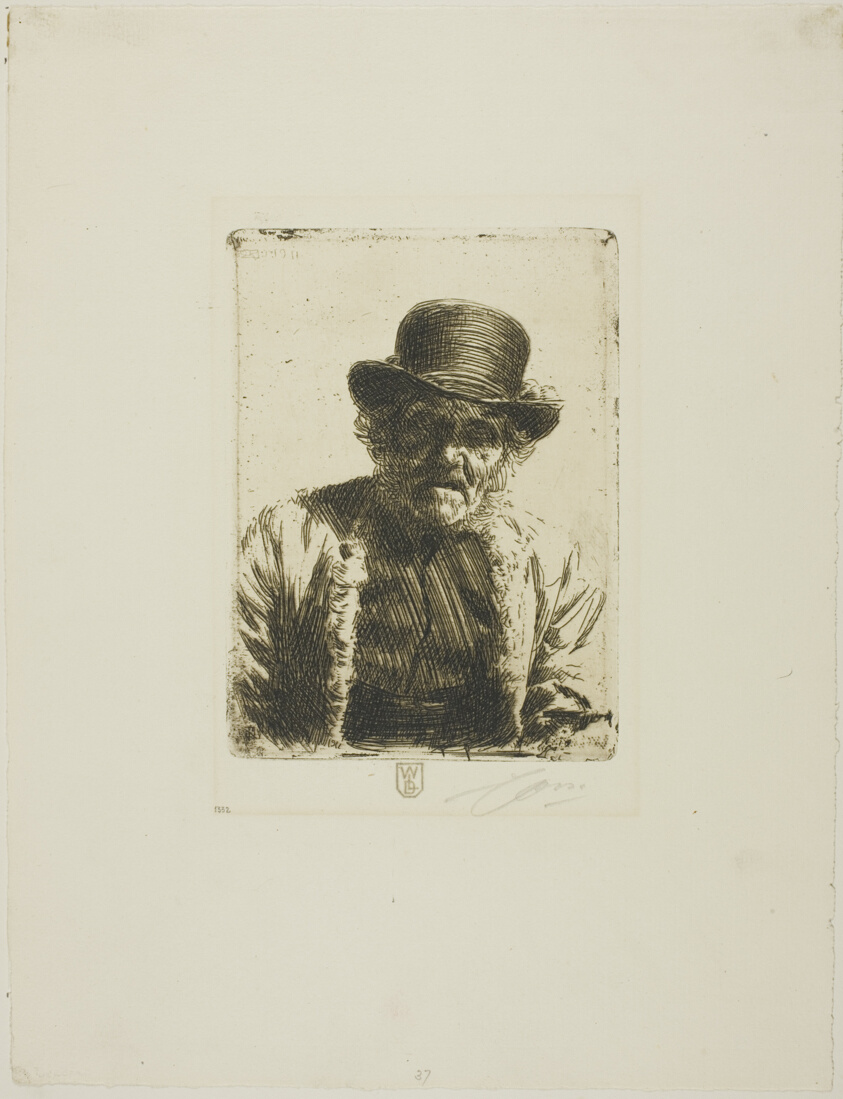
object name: Print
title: Beadle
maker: Anders Zorn (Swedish, 1860-1920)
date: 1911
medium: Etching on ivory laid paper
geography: Sweden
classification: etching; print; prints and drawing